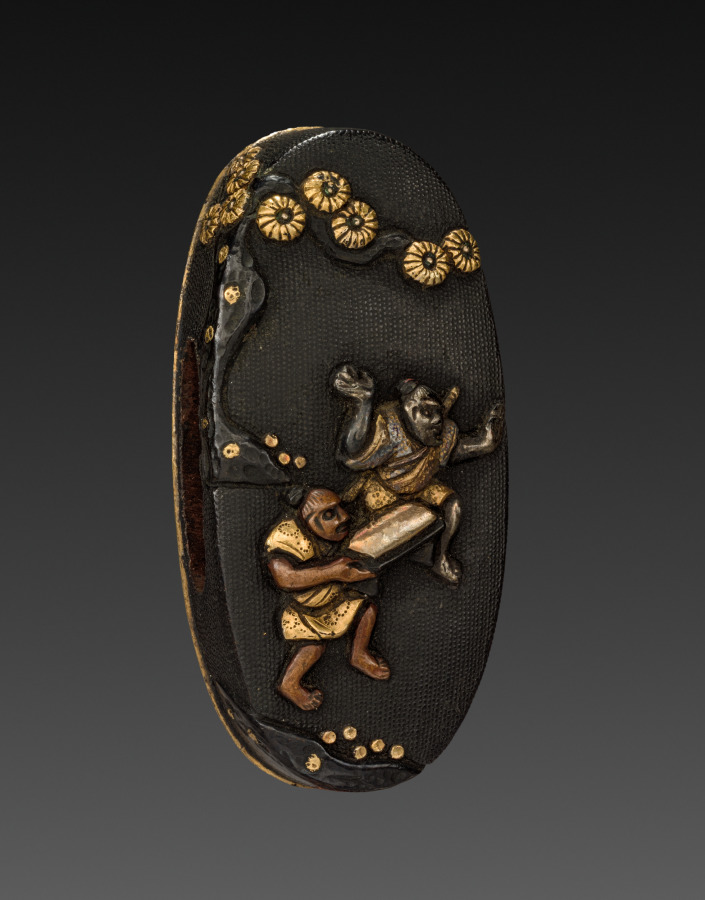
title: Sword-Hilt Pommel (Kashira)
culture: Japan, Edo period (1615–1868)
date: 1700–1850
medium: shakudo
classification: Arms and Armor